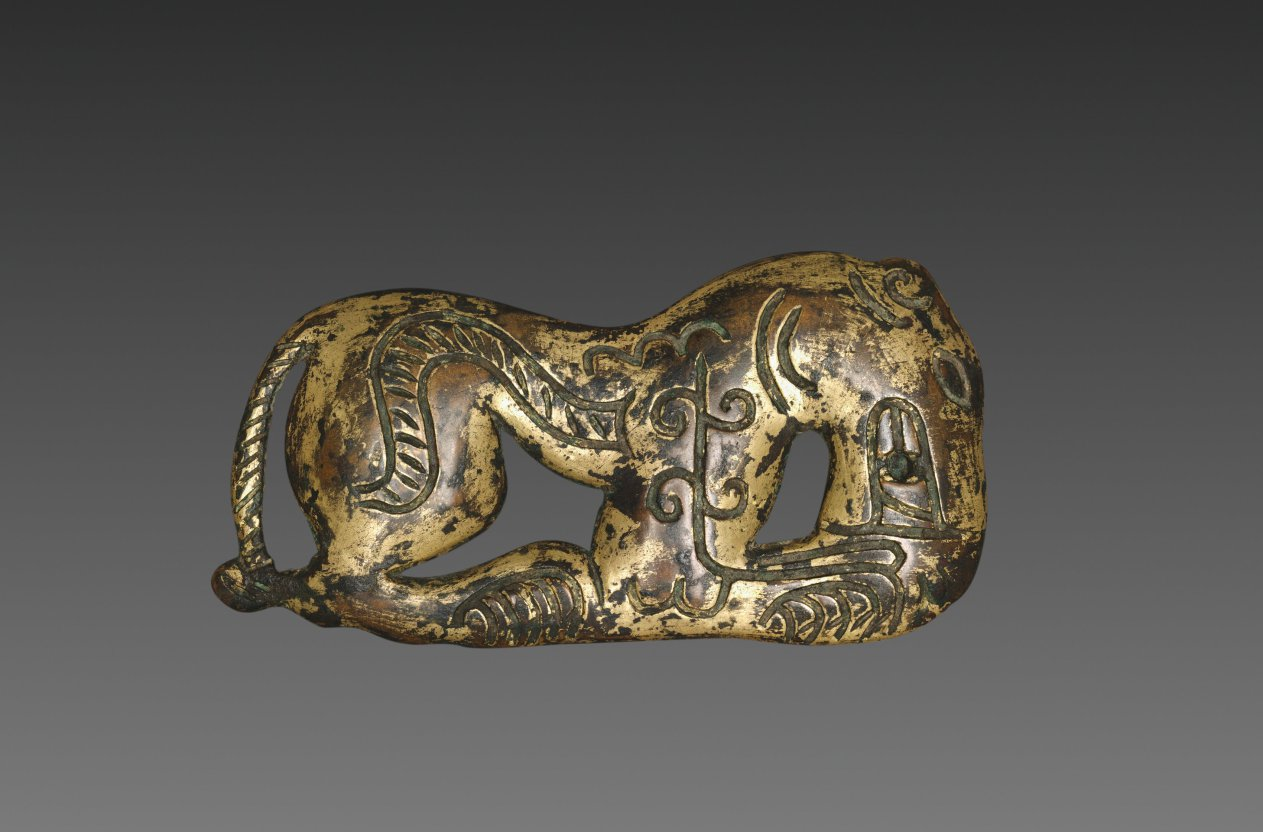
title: Ornament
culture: China, Ordos Region, Han dynasty (202 BCE–220 CE)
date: 206 BCE–220 CE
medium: gilt bronze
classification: Metalwork